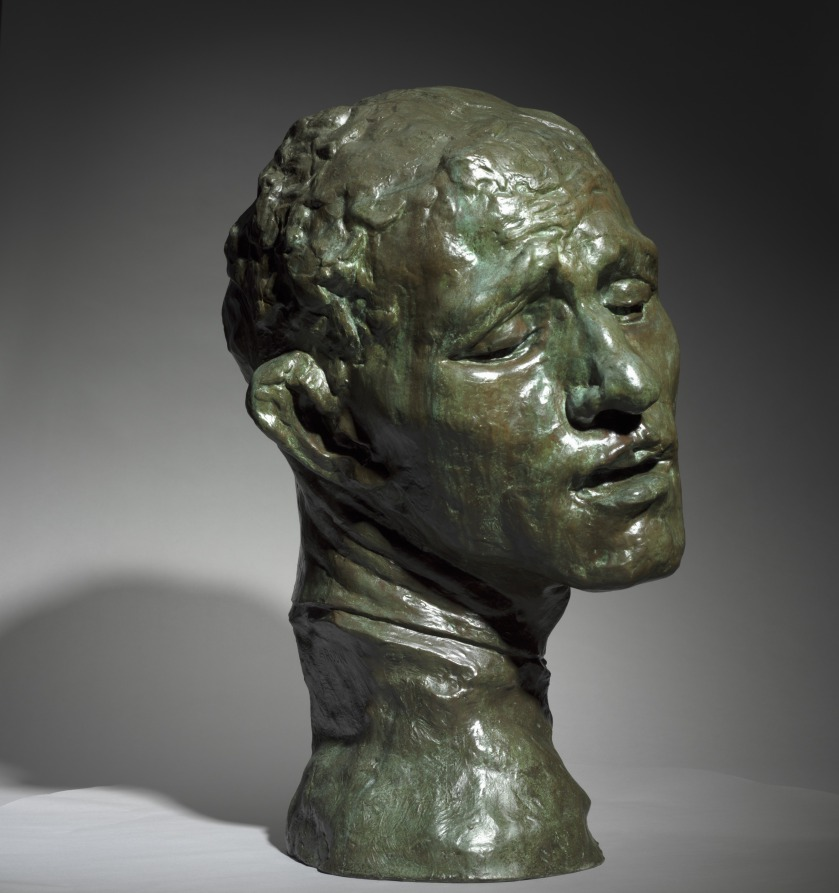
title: Heroic Head of Pierre de Wissant, One of the Burghers of Calais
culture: France, 19th century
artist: Auguste Rodin (French, 1840–1917)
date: 1886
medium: bronze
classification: Sculpture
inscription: inscribed at neck, left: A.Rodin; inscribed lower back: Alexis Rudier/Fondeur-Paris.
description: This sculpture depicts one of the figures in Rodin’s large public monument The Burghers of Calais (1884–89), featuring six French men who volunteered to be taken prisoner by the English in exchange for lifting the siege of Calais during the Hundred Years War (1337–1453). Pierre de Wissant’s anguished expression suggests extreme mental suffering as he contemplates his expected execution. Rodin exhibited a life-size version of the figure as an independent work before completing the monument. He later made multiple versions in various sizes and media.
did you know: This sculpture depicts the head of a figure from Rodin's large public monument The Burghers of Calais (1884-89). The CMA also owns a plaster version of the head.